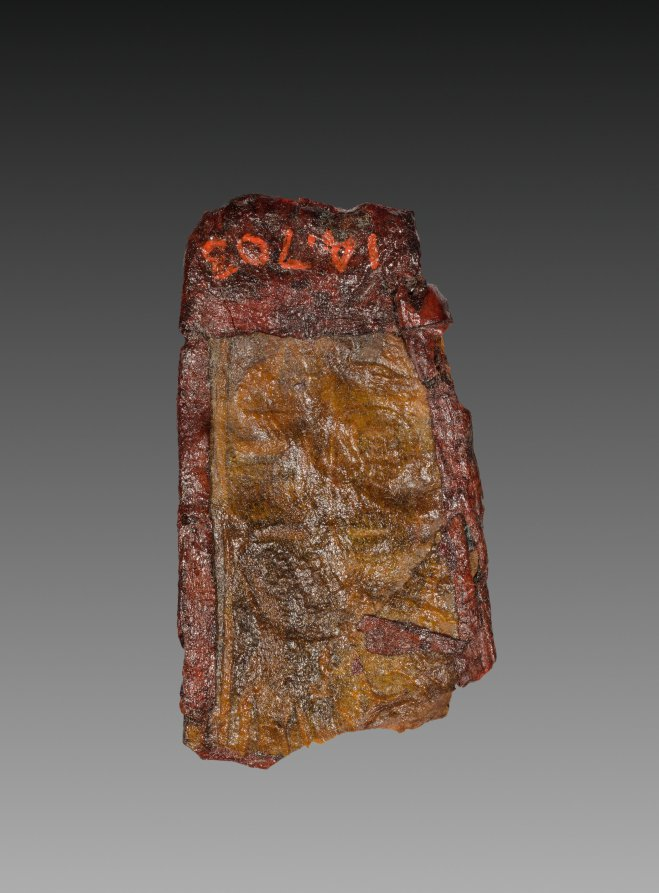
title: Tab from Mummy Band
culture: Egypt, Third Intermediate (1069–715 BCE), Dynasty 22, reign of Osorkon I (992–887 BCE)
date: 945–715 BCE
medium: stained leather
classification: Funerary Equipment